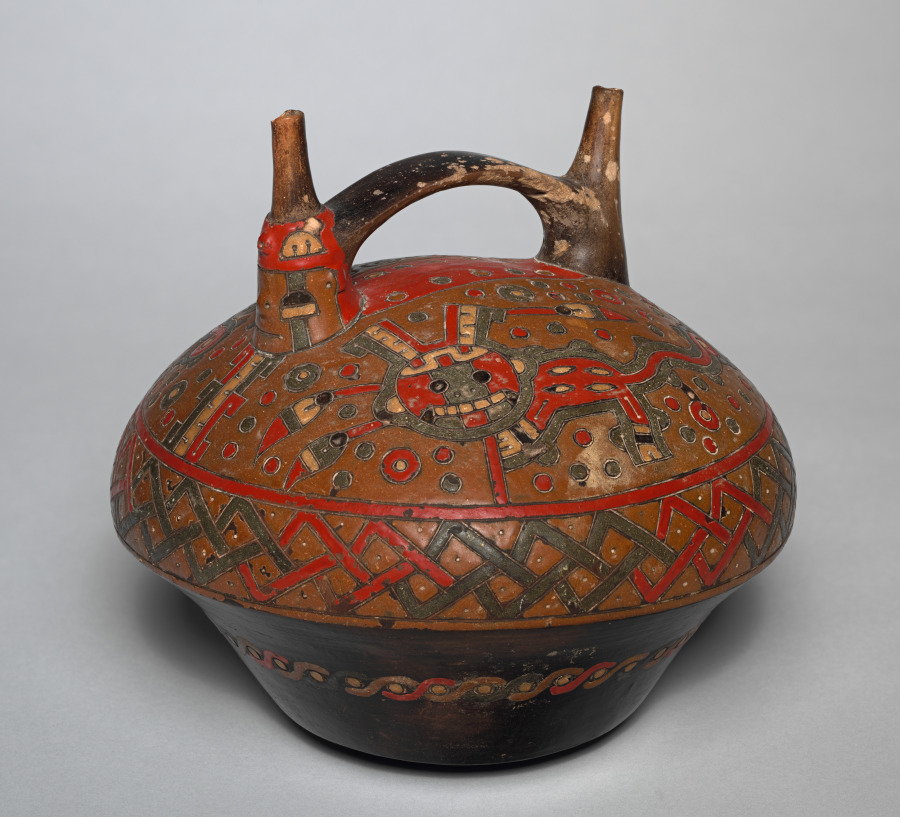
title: Double-spouted Vessel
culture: Andes, south coast, Paracas people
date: 750–1 BCE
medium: Ceramic, resin-based paint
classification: Ceramic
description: The Paracas style, the earliest of Peru’s south coast, focuses on geometric abstraction and polychromy, the latter achieved in ceramics with resin-based paints applied after the vessel was fired. This example is embellished with two monkey- or feline-like creatures whose curvilinearity indicates the vessel was made in the late stages of the Paracas sequence.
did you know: A face with upturned eyes on one spout gives this vessel a specific orientation.